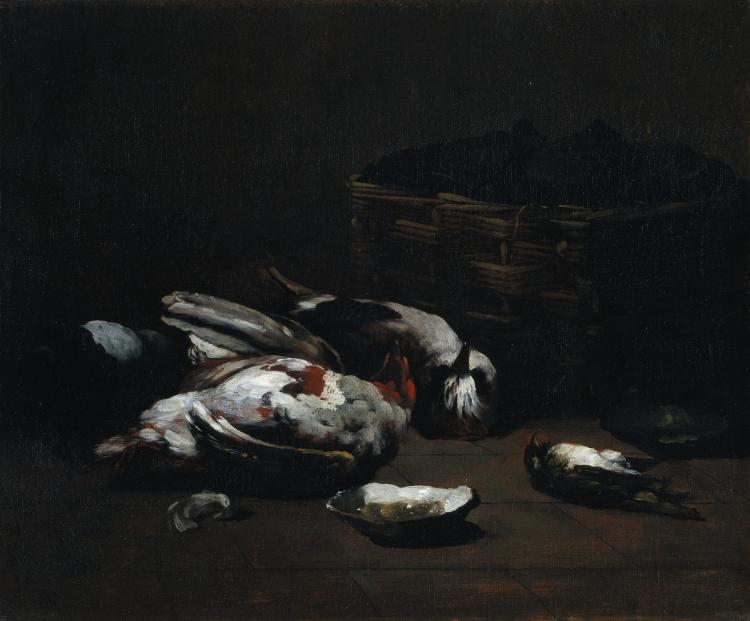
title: Still Life with Dead Birds and a Basket of Oysters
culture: France, 19th century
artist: Germain Ribot (French, 1845–1893)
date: c. 1860–80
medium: oil on fabric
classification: Painting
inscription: Signed lower left: Germain Ribot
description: Against a dark brown background, Ribot painted a basket filled with oysters. Light coming from the left is gently cast over the wicker basket. A dead magpie, with its white chest and long black beak, emerges from the shadows at the left. This bird, along with the partridge in the foreground, the jay toward the back, and what appears to be a sparrow at the right, are probably located in a kitchen, where preparations for cooking will soon begin. Germain Ribot, who painted genre (everyday life) scenes and still lifes, was the son of the more famous Théodule-Augustin Ribot (1823-1891), known for his working-class and peasant subjects.